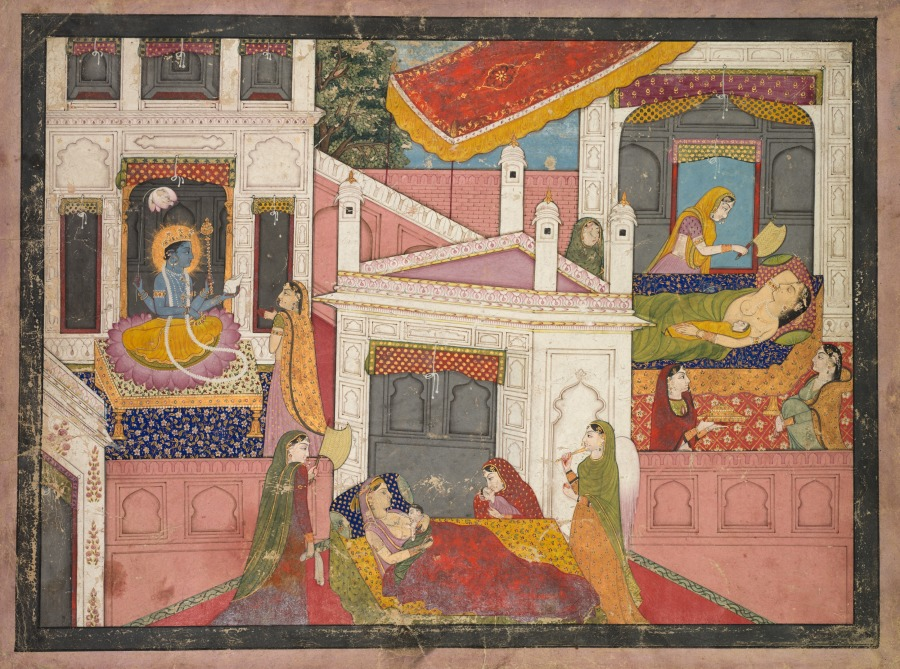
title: The birth of Rama and his brothers, from Chapter 17 of the Bala Kanda (Book of Childhood) of the Adhyatma Ramayana (Rama's Journey of the Supreme Spirit) from the Brahmanda Purana (Ancient Scripture of the Cosmic Egg)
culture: Northern India, Pahari Region, Himachal Pradesh, Rajput Kingdom of Kangra, Court of Aniruddh Chand (reigned 1823–33)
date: c. 1820–30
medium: Gum tempera, ink, and gold on paper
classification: Painting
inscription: [[verso, in Sanskrit]] aśame māsi kausalyā suṣuve putramadbhutam madhumāse site pakśe navamyāṁ karkaṭe śubhe punarvakhṛkśasahite uccasye grahapañcake meṣaṁ pūṣaṇī saṁprāpte puṣpavṛṣtisamākule āvirāsījjagannathaḥ paramātmā sanātanaḥ nīlotpaladalaśyāmaḥ pītavāsaścaturbhujaḥ jalajāruṇanetrantaḥ sphuratkuṇḍalamaṇḍitaḥ sahastrārkapratīkāśaḥ kirīṭī kuñcitālakaḥ śaṅkhacakragadāpadyavanamālāvirājitaḥ anugrahākhyahṛtsthendusūcakasmitacandrikaḥ karuṇārasasampūrṇavishālotpalalocanaḥ śrīvatsahārakeyūranū purādivibhūṣaṇa. dṛṣṭvā taṁ paramātmānaṁ kausalyā vikhayākulā harṣaśrupūrṇanayanā natvā prāñjalirabravīt kausalyovāca devadeva namastestu śṁkhacakragadādhara parmātmācyutonantaḥ pūrṇastvaṁ puruṣottamaḥ vadantyagocaraṁ vācāṁ buddhathādīnāmatīndriyam tvāṁ vedavādinaḥ sattamātraṁ jnanaikavigraham svameva māyayā viśvaṁ sṛjasvavasi haṁsi ca sattvadiguṇasaṁyuktasturya evāmalaḥ sadā karoviva na kartā svaṁ gacchasīva na gacchasi śṛṇoṣi na śṛṇovīva paśyasīva na paśyasi agrāṇo śmanāḥ suddha ityādi śrutirabravīt samaḥ sarveṣu bhūteṣu tiṣṭhaapi na lakśyase ajnānadhvāntacitānāṁ vyakta eva sumedhasām jaṭhare tava dṛśṁyante brahmāṇḍāḥ paramāṇavaḥ tvaṁ mamodarasambhūta iti lokānviḍambase bhakteṣu pāravaśyaṁ te dṛṣṭaṁ megha raghūttama saṁsārasāgare magnā patiputradhanādiṣu bhramāmi māyayā tegha pādamūlamupāgatā deva tvadrūpametanme sadā tiṣṭhatu mānase āvṛṇotu na māṅ māyā tava viśvavimohinī upasaṁhara viśvāsma ado rūpamalaukikam darśayasva mahānandabālabhāvaṁ sukomalam lalitāliṁganālāpaistariṣyāmyutkataṁ tamaḥ śrībhagavānuvāca yadyadiṣṭhaṁ tavāstyamba tattadravatu nānyatha ahaṁ tu brahmaṇā pūrvaṃ bhūmerbhārāpanuttye prārthito rāvaṇaṃ mānuṣatvamupāgataḥ svayā daśarathenāhaṁ tapasārādhitaḥ purā matputratvābhikāḍikśaṇyā tathā kṛtamanindite rūpametatvayā dṛṣṭaṃ prāttanaṃ tapasaḥ phalam maddarshanaṃ vimokśāya kalpate hmanyadurlabhaṁ saṁvādamāvayoryastu paṭheddhā ṣṛṇuyādapi sa yāti mama sārūpyaṁ maraṇe matsmṛtiṃ labhet ityuktvā mātaraṁ rāmo bālo bhūtvā ruroda ha bālatvepīndranīlābho viśālakśotisundaraḥ bālāruṇapratīkāśo lālitākhilalokapaḥ atha rājā daśarathaḥ śrutvā putrodbhavotsavam ānandārṇavamagnpsāvāyayau guruṇa saha rāmaṁ rājīvapatrākśaṁ dṛṣtvā harṣaśrusaṁplutaḥ guruṇa jātakarmāṇi kartavyāni cakāra saḥ kaikeyī cātha bharatamasūta kamalekśaṇa sumitrāyāṁ yayau jātau purṇendusadṛśānanau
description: In a retelling of the Ramayana from the 1200s, the blue god Vishnu appears in a vision to Queen Kaushalya just before she gives birth to his incarnation as Rama. In the foreground, her co-wife Queen Sumitra nurses one of her own newborn twins, Lakshmana and Shatrughna. Rama’s half-brother Bharata lies swaddled next to his mother Queen Kaikeyi on an adjacent terrace of the women’s quarters. The patterned carvings and textiles of the palace interior communicate the luxury into which the princes were born, and from which Rama and Lakshmana will be eventually exiled.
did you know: King Dasharatha thought his wife Kaikeyi, shown sleeping, was the most beautiful of his three wives.